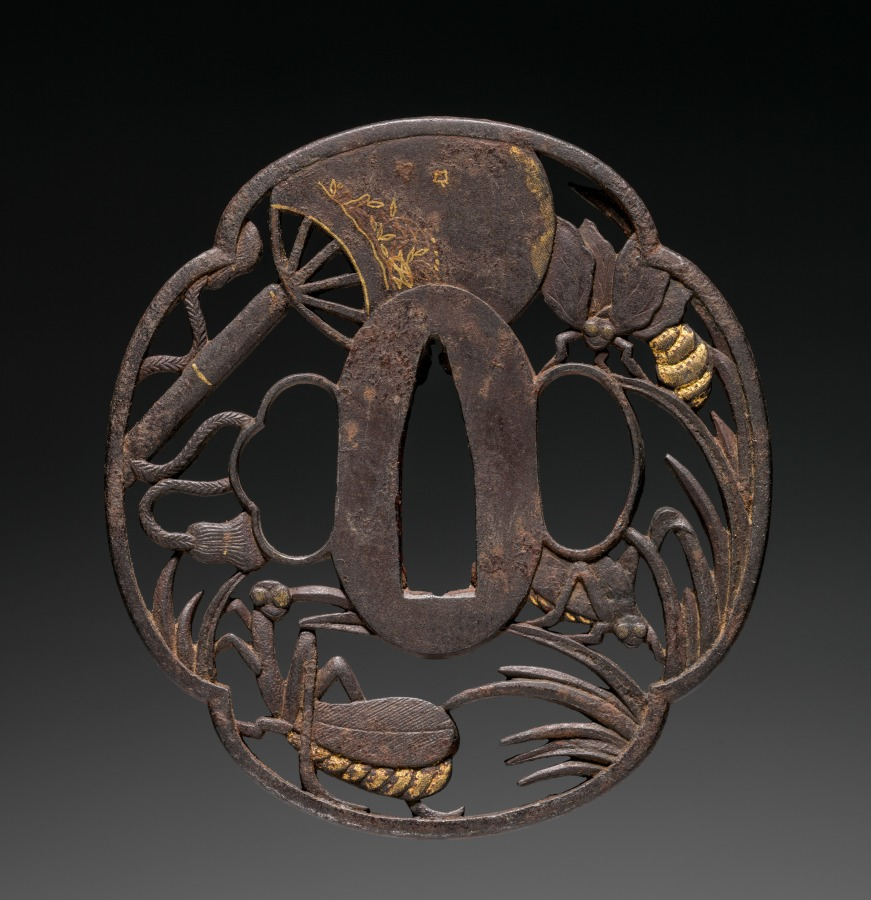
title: Sword Guard (Tsuba) with Insects and Fan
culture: Japan, possibly Edo period (1615-1868)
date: c. 1615–1868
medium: iron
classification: Arms and Armor